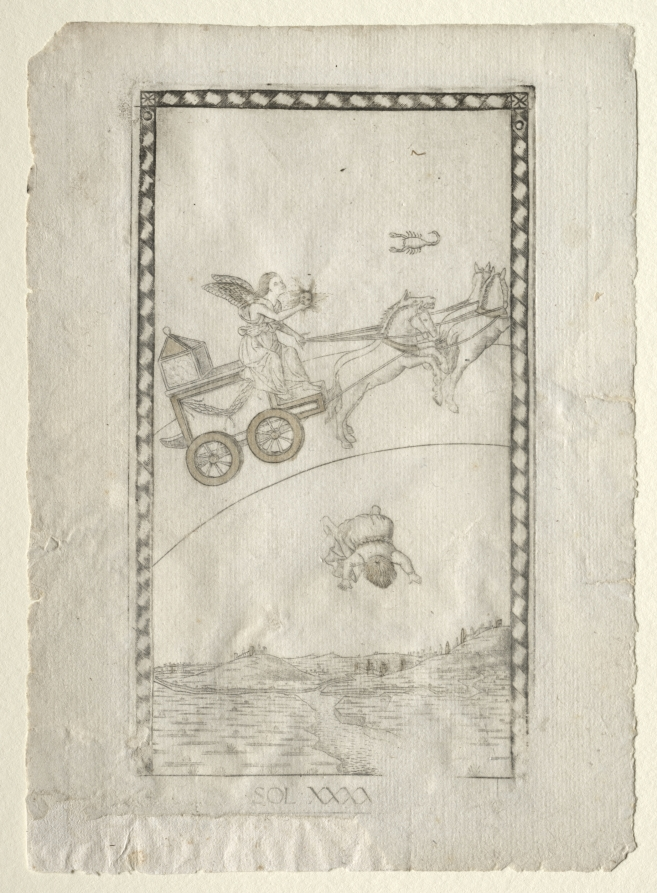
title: Sun (from the Tarocchi, series A: Firmaments of the Universe, #44)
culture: Italy, Ferrara, 15th century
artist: Master of the E-Series Tarocchi (Italian, active 1460s)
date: before 1467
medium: engraving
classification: Print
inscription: Lettered below the image of Sol (Sun): [A] / SOL·XXXX[IIII] / [44]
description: This engraving is part of the Tarocchi group marked with the letter “A”, and named Firmaments of the Universe. This series comprises the seven planets from the classical astronomy (Moon, Mercury, Venus, Sun, Mars, Jupiter, Saturn) and the three celestial spheres that separate them from the Supreme Entity (Prima Causa) from which everything was originated. Here, Sol (Sun) is personified as a male figure, in profile, steering a chariot drawn by four horses in the sky, and above an imaginary landscape. In his right hand holds up a sun-face, whilst he looks towards a scorpion. Sun appears as Helios, the Greek God of Sun, and father of Phaeton. The latter secretly mounted Helios’ chariot, became frightened once high over the earth, and consequently fell from the sky down into the river Eridanos, as it is shown in this print.